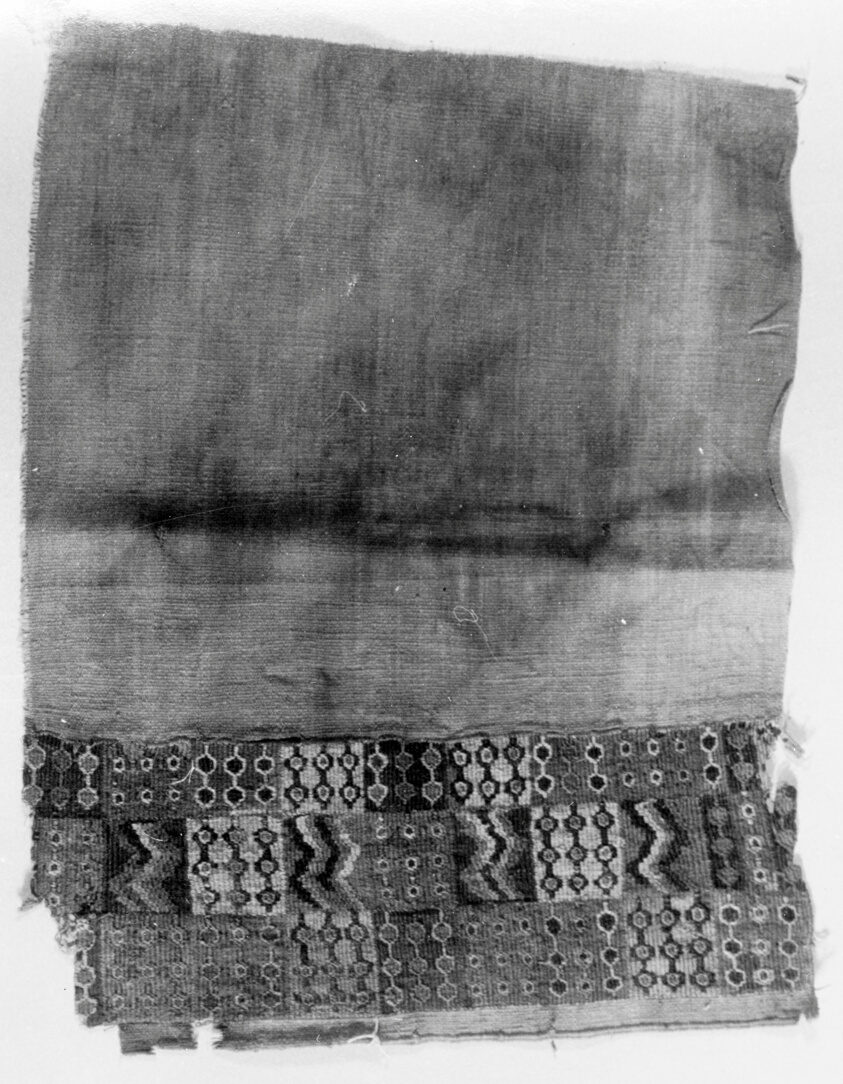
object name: Textile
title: Fragments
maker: Probably central coast, Peru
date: A.D. 1000/1476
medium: Plain cloth with interlocking tapestry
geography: Peru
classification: textile; weaving